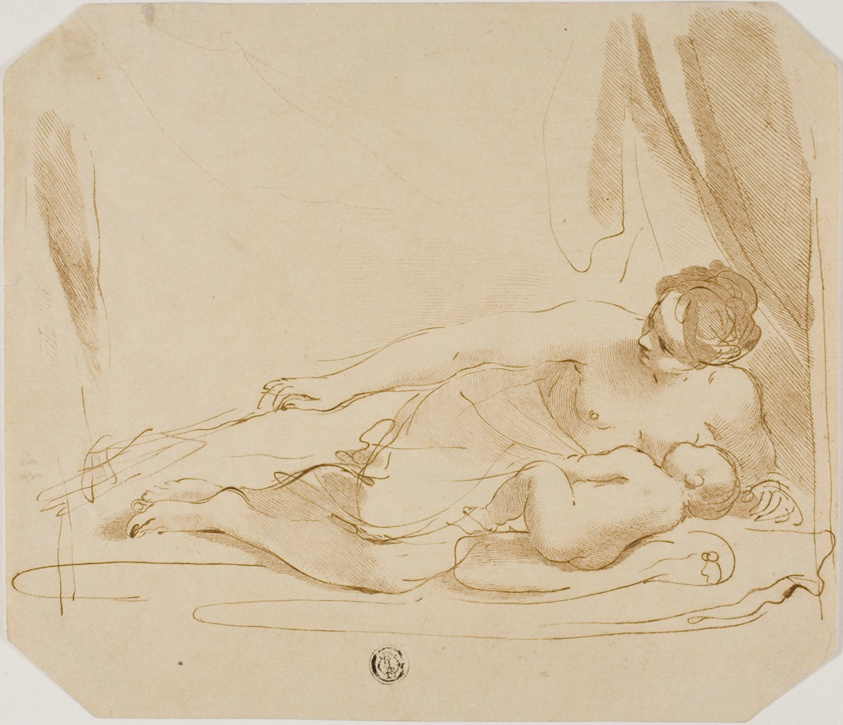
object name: Print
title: Venus and Cupid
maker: Francesco Bartolozzi (Italian, 1727-1815); after Guercino (Italian, 1591-1666)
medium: Engraving in brown ink on cream wove paper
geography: Italy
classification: engraving; print; prints and drawing